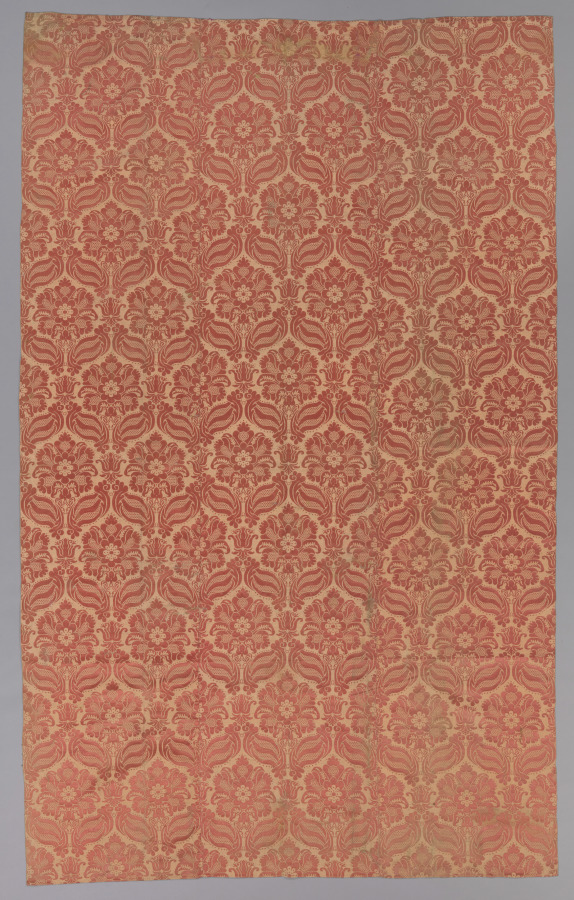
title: Textile Panel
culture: Italy, 17th century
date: 1600s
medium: lampas weave, silk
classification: Textile